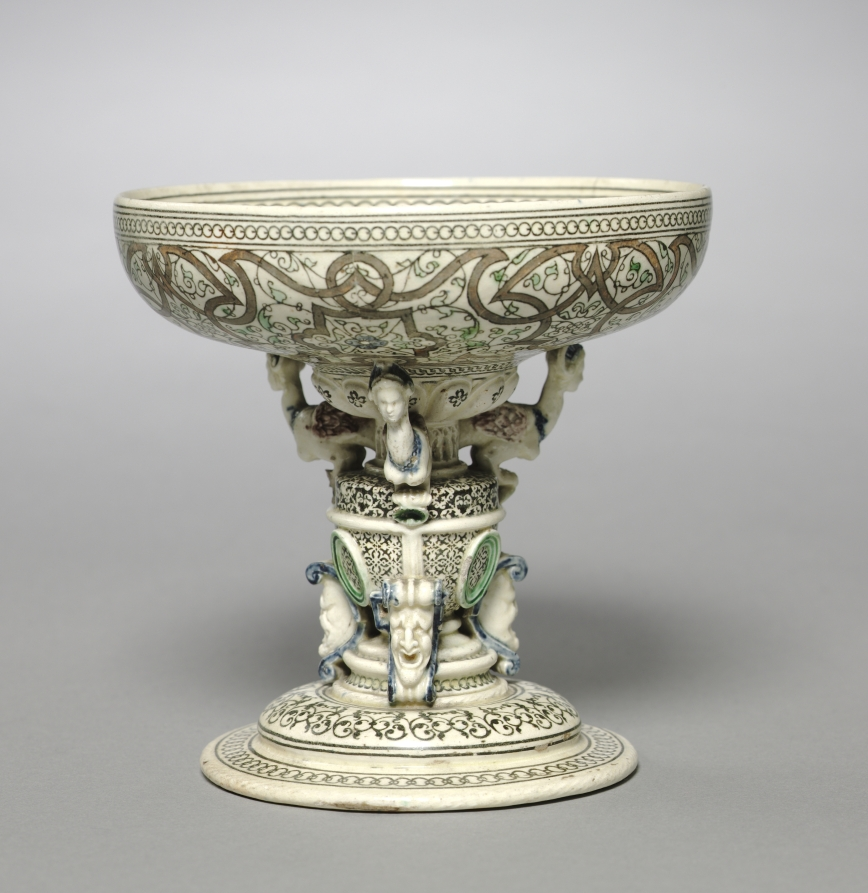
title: Standing Cup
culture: France, 16th century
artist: Saint-Porchaire (French)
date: c. 1540–60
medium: lead-glazed, white-paste earthenware with inlaid slip decoration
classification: Ceramic